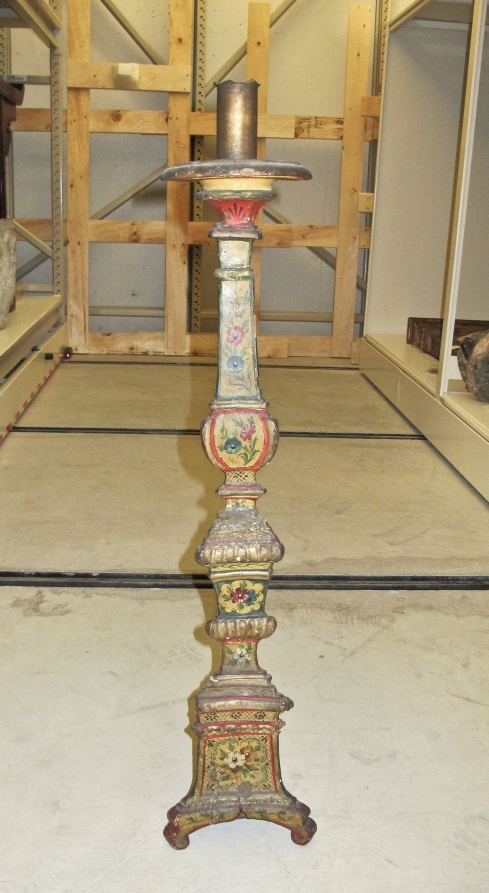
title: Candleholder (1 of 2)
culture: Italy, Florence, 18th century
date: 1700s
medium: carved and painted wood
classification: Furniture and woodwork